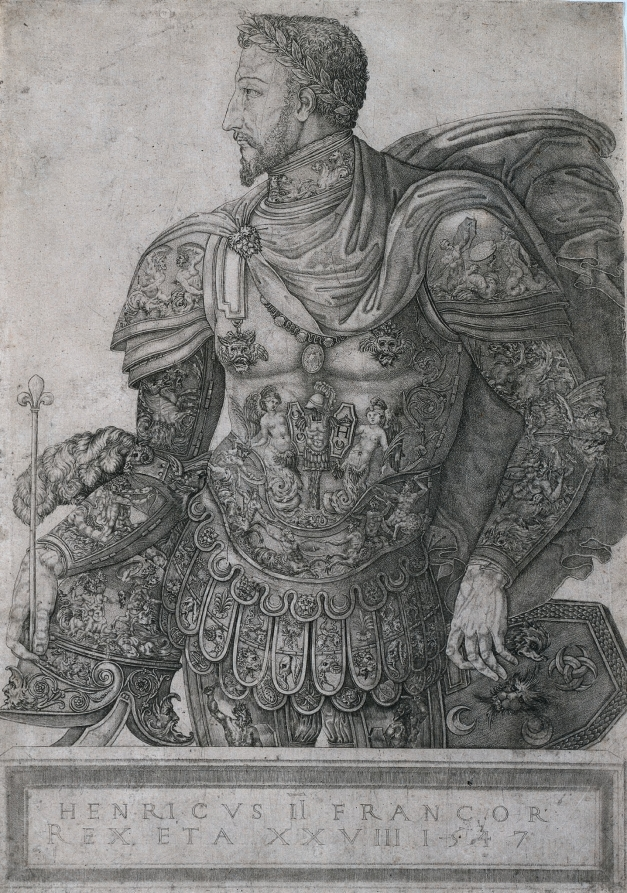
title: Henri II, King of France, at the age of 28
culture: France, 16th century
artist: Nicolo della Casa (French, active 1543–48)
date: 1547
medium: engraving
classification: Print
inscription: across bottom, in plate: HENRI C VS II FRANCOR / REX ETA XXVIII 1547 ; VERSO, across bottom, in graphite: Attribue a N. della Casa / [illegible] ; lower center, in pen and brown ink: M M S ; lower right, in graphite: c. 442 [underlined]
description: Comparing Renaissance princes with distinguished ancient leaders was a common theme in laudatory speeches, literature, and art. In commemoration of Henri II’s coronation as King of France (reigned 1547–59), Nicolo della Casa portrayed the monarch as a valiant Roman general. Crowned with a laurel wreath, the king’s head is in full profile, the traditional format used on ancient coins and engraved gems. He wears a muscled ceremonial cuirass, its breastplate heavily ornamented with war trophies, mermaids, and fighting tritons. The historicized armor, derived from antique imperial portraits and figures of the war-god Mars, creates a powerful and timeless image of the French sovereign.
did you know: Henry II loved finely embossed parade armor. He died at the age of 41 after having his eye put out during a tournament.